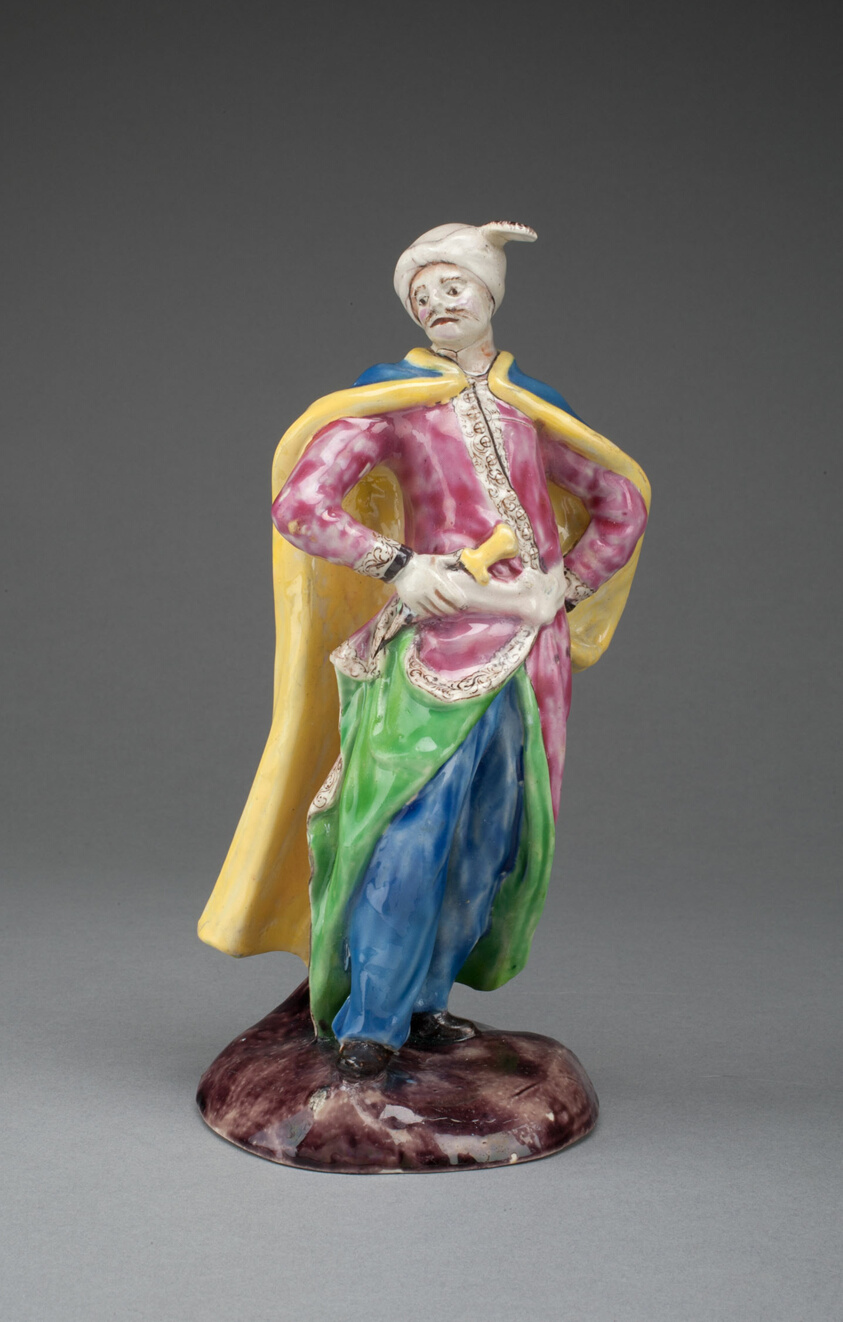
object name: Ceramics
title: Figure of a Turk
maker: Staffordshire, England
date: 1765/75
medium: Salt-glazed stoneware, polychrome enamels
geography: Staffordshire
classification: salt-glazed stoneware; european decorative arts; ceramics; stoneware